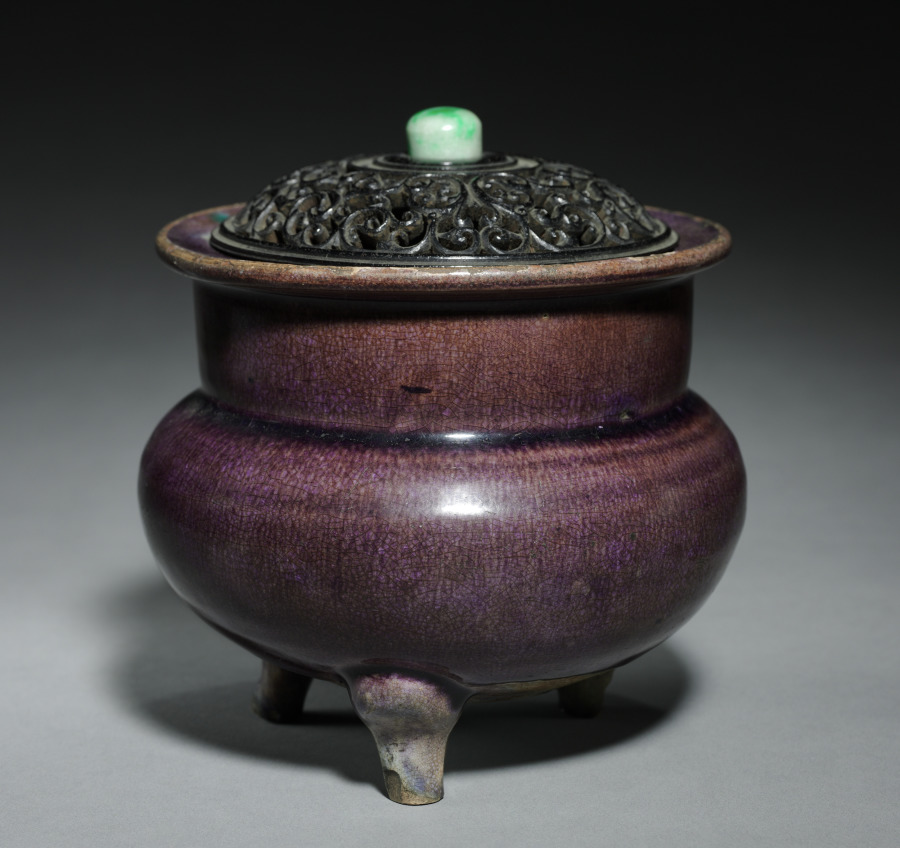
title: Tripod: Ding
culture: China, Ming dynasty (1368–1644)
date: 1368–1644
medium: porcelain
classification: Ceramic